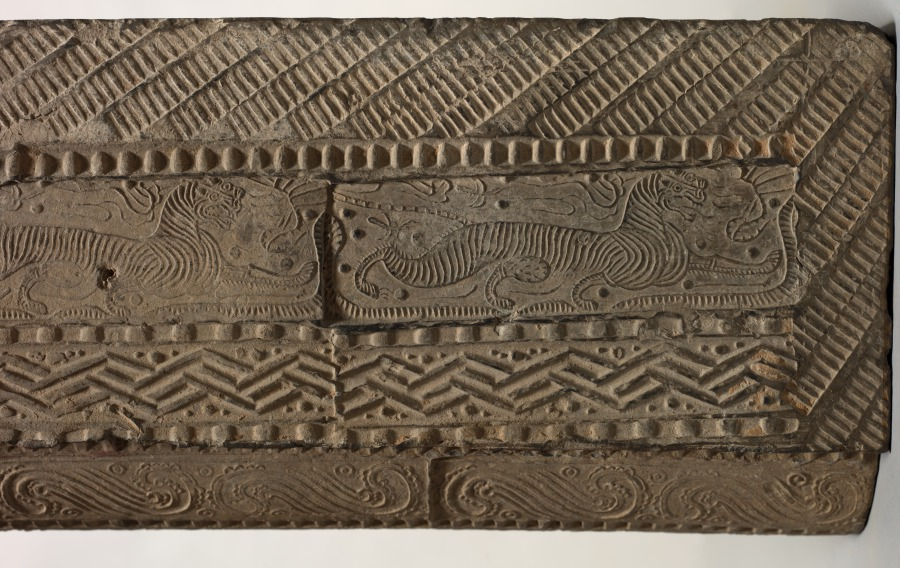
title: Hollow Tile: Lintel from Tomb-Chamber Doorway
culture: China, Han dynasty (202 BCE–220 CE)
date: 100–200 CE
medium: earthenware, die-stamped relief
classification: Ceramic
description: Striding tigers (top), racing horsemen (right column), and reverent officials (left column) are stamped into the surface of this underground portal to a tomb. The doorway preserves in stone the post-and-lintel structure, a basic element of Chinese wooden architecture. By the first century CE, a revolution in Chinese tomb construction and furnishing had taken place. Tombs lined with decorated bricks and tiles replace the earlier tombs constructed with only rammed-earth walls. Ceramic surrogates or models of stoves, houses, servants, and pets filled these more durable chambers, symbolically extending the creature comforts of this world into the world after death.